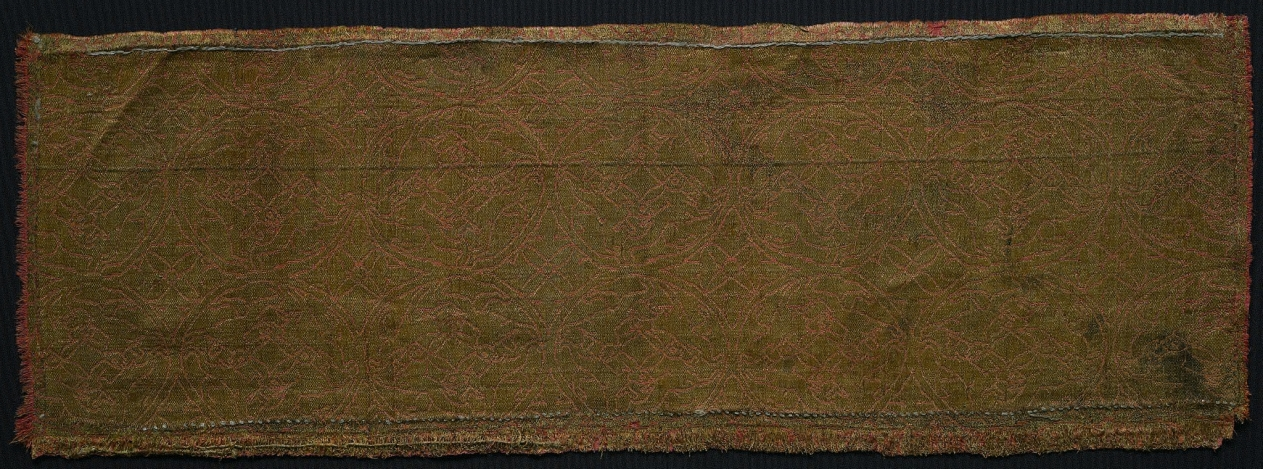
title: Cloth of Gold with Rabbit Wheels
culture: Eastern Iran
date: c. 1225–50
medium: Silk and gold thread: lampas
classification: Textile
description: Cloth of Gold with Rabbit Wheels Lampas; silk and gold thread Eastern Iranian world, about 1225-1260 The Cleveland Museum of Art, John L. Severance Fund 1993.140 (Cat. no. 45) The lavish amount of gold-used here for both the pattern and the background-reflects the extravagant taste of the Mongols. Known as "cloths of gold," such textiles were primarily woven for the official costumes of the Mongol court. Repeated roundels enclose four rabbits that share two pairs of ears and run in a circle. This motif, known as an animal wheel, is very ancient in Asia. Rabbits are commonly found on eastern Iranian metalwork dating from around 1200. Although the Mongol conquest of the Eastern Iranian world had taken place (1220-22), traditional silk patterns continued to be produced through the mid-1200s.